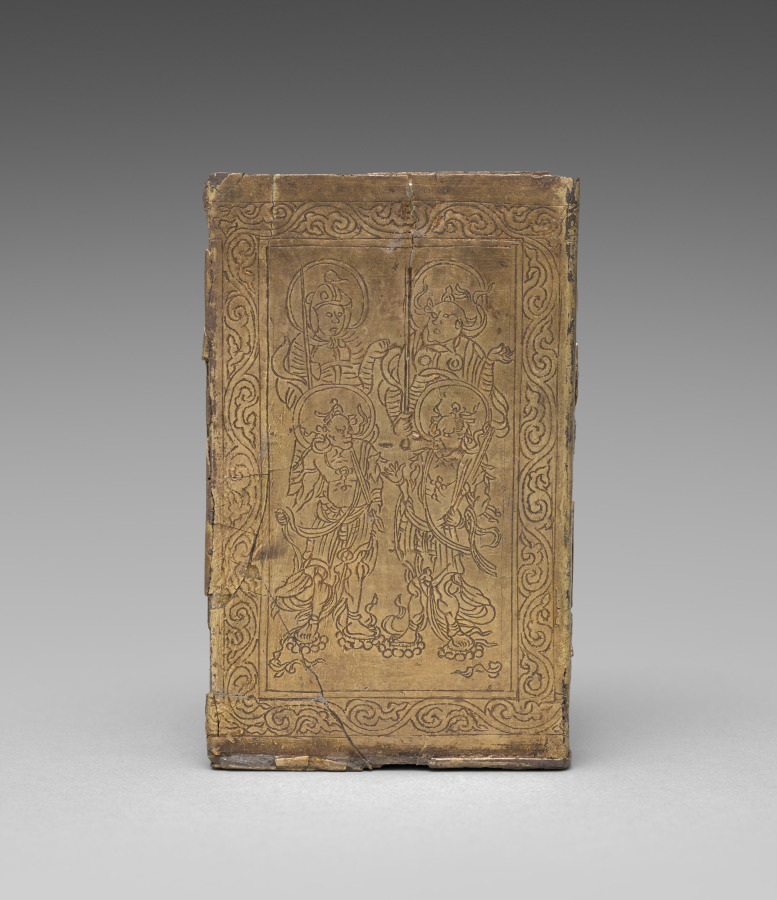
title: Buddhist Sutra Container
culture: Korea, Goryeo dynasty (918–1392)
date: 1100s-1200s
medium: gilt silver with incised Buddhist designs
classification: Metalwork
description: This container was designed to hold sutras, or Buddhist sacred texts. The Four Heavenly Kings, one for each of the cardinal directions, are incised on the exterior of the container. Images of the Four Heavenly Kings can often be found on Korean containers for sacred relics and sutras, and are symbolic of the wish to preserve the Buddha’s teachings.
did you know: This container was designed to hold a portable Buddhist sacred text.